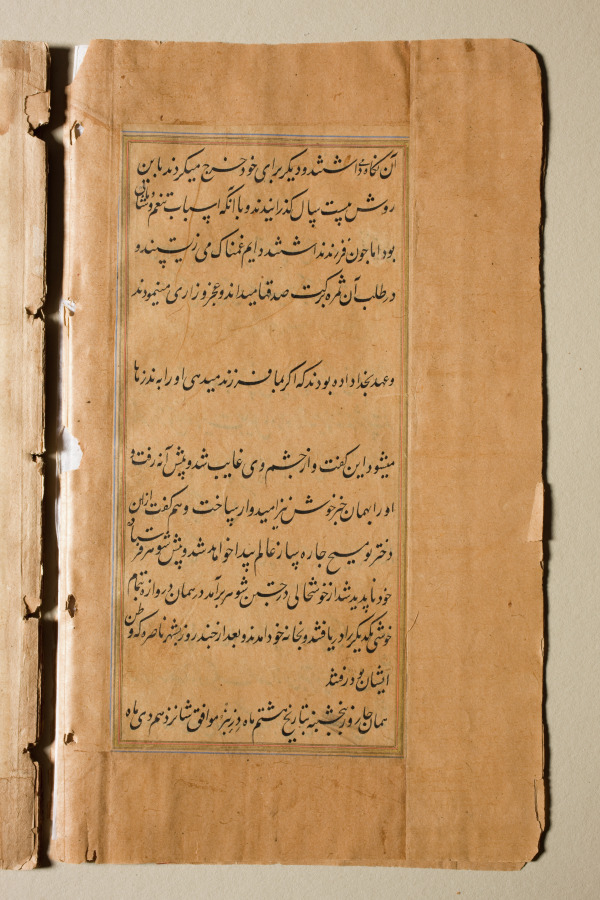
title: Text, Folio 6 (verso), from a Mirror of Holiness (Mir’at al-quds) of Father Jerome Xavier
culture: Mughal India, Allahabad, made for Prince Salim (1569–1627)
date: 1602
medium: Ink and gold on paper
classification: Manuscript